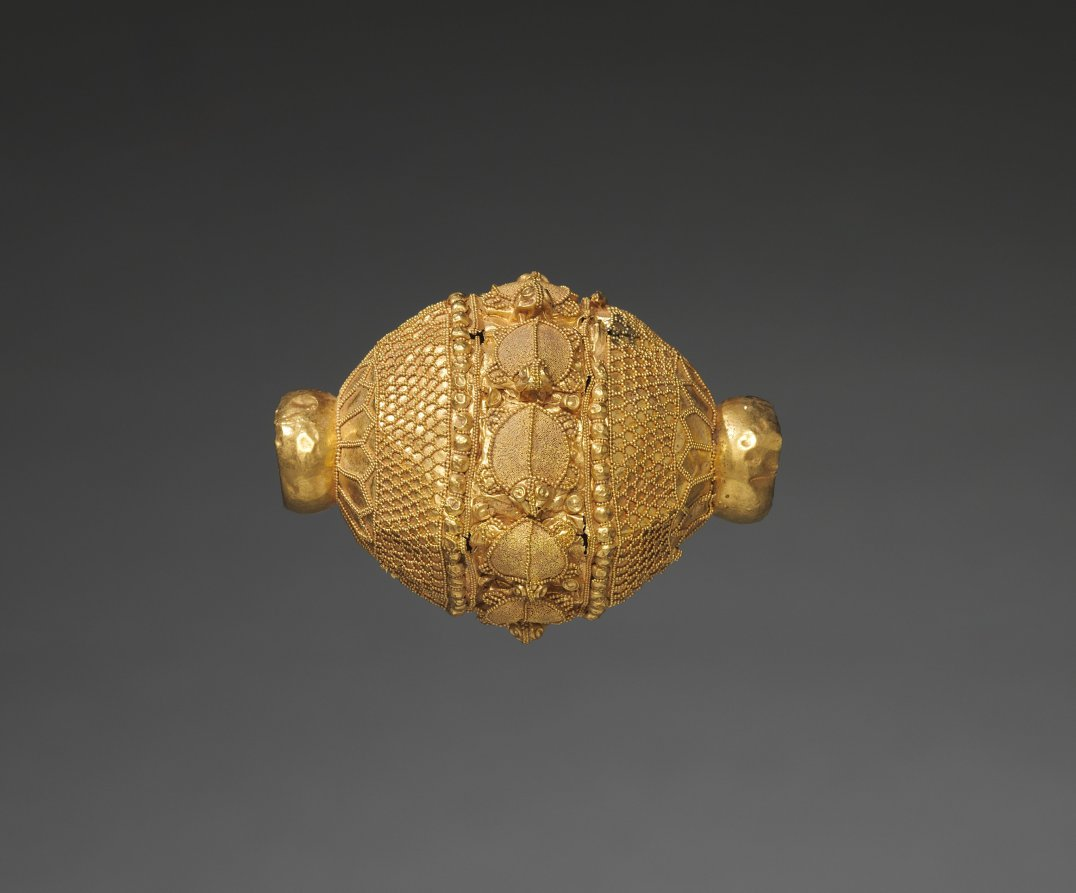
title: Necklace Bead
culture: India, Uttar Pradesh or Madhya Pradesh, Shunga period (185–78 BCE)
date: 185–72 BCE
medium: gold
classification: Jewelry